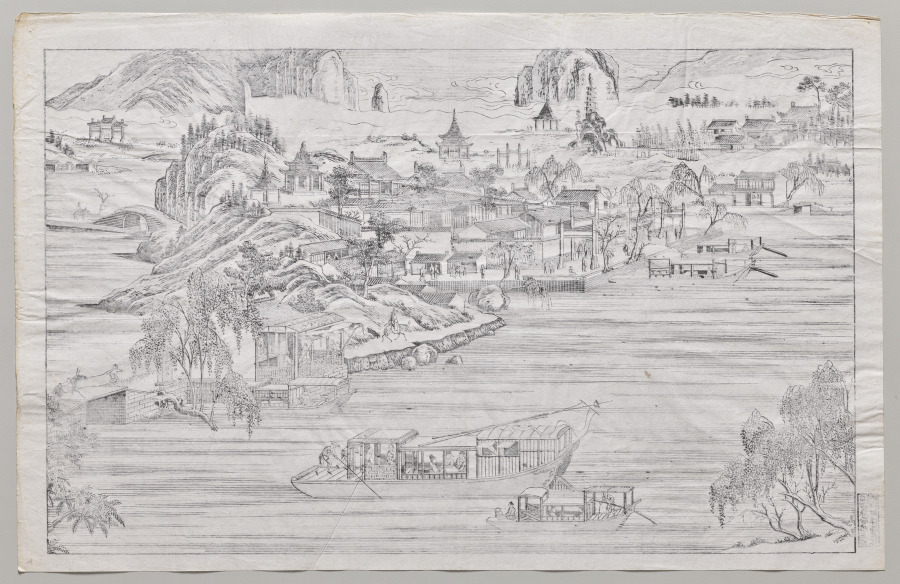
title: Westlake Panorama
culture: China, Qing dynasty (1644–1911), Qianlong reign (1736–95)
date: mid-1700s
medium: One of four woodblock prints; ink on paper; printed with three woodblocks in shades of black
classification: Print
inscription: 信德號 姑蘇管瑞玉頂細西洋畫發客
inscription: The 10 scenes on the four prints are identified by their titles: Print one: 1. Remnant Snow on Broken Bridge (Duanqiao canxue, 斷橋殘雪), 2. Lotus Breeze at Qu Winery (Quyuan fenghe, 曲院風河 [sic]). Print two: 3. Autumn Moon over Placid Lake (Pinghu qiuyue, 平湖秋月), 4. Twin Peaks Piercing the Clouds (Liangfeng chayun, 兩峰插云), 5. Spring Dawn at Su Dike (Sudi chunxiao, 蘇 堤春曉), 11. The emperor’s temporary palace (xinggong, 行宮). Print three: 6. Listening to the Orioles by the Willow Ripples (Liulang wenying, 柳浪 聞鶯), 7. Three Stupas and the Reflecting Moon (Santan yinyue, 三潭印月). Print four: 8. Watching Fish at Flower Cove (Huagang guanyu, 花港觀魚), 9. Sunset at Leifeng Pagoda (Leifeng xizhao, 雷峰夕照). 10. Evening Bell from Nanping Hill (Nanping wanzhong, 南屏晚鍾.) In print two, 11. the emperor’s temporary palace (xinggong 行宮) is also identified.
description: Revived by the southern imperial inspection tours, West Lake imagery became a popular subject during the early Qing dynasty. This panorama is composed of four prints, showing the Ten Scenes of the West Lake in Hangzhou along with other sights. The vanishing point perspective and the hatching lines that depict shading, water, or sky derive from European copperplate prints, introduced by missionaries to China, and were celebrated novelties in 18th-century Suzhou prints. These prints also reached Europe to furnish 18th-century palace interiors.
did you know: Woodblock printing in color reached a height in China in the 1600s to 1700s. The prints were executed by means of sets of separate blocks, each carved to print a different color.